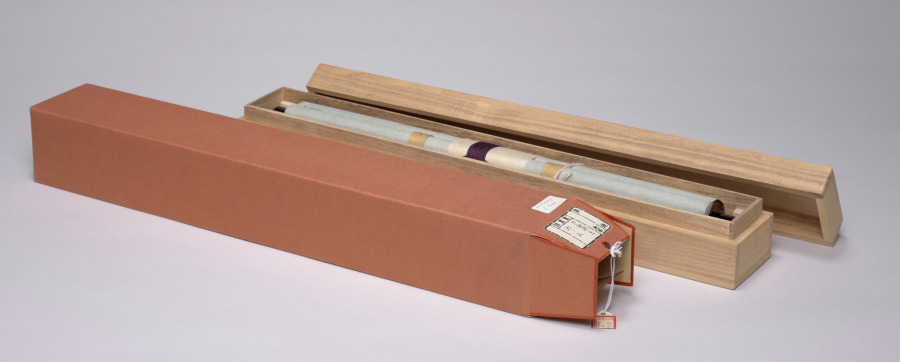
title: One Hundred Images of Fudo (Acala)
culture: Japan, Kamakura period (1185–1333)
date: 1200s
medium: Woodblock print mounted as a hanging scroll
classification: Print